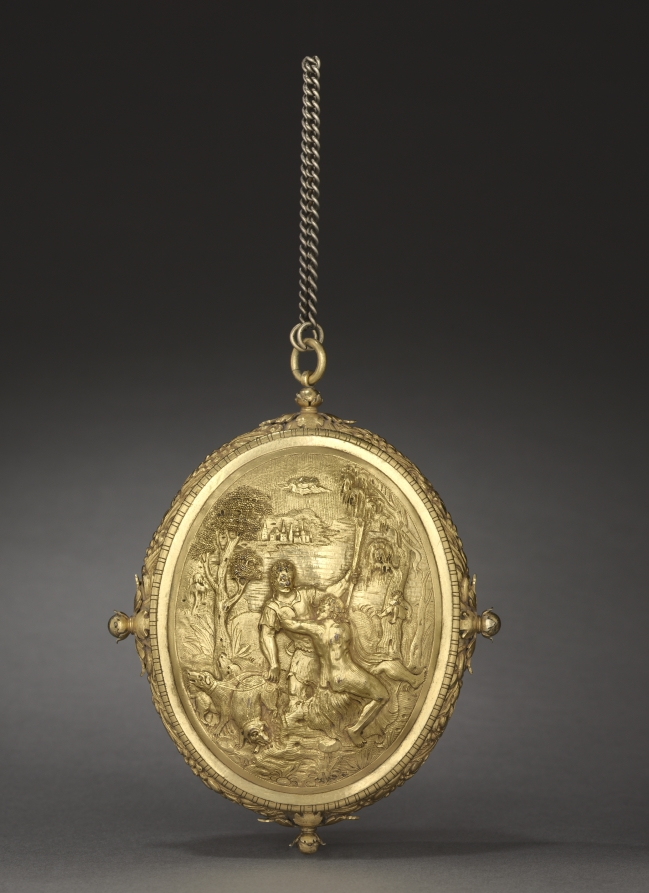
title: Locket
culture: Germany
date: c. 1565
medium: gilt copper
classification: Jewelry